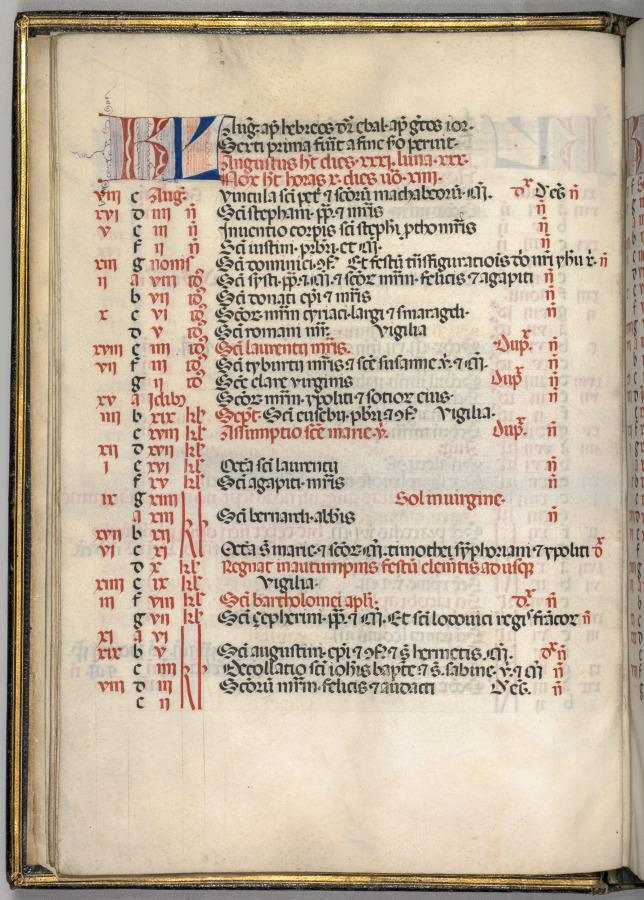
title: Missale: Fol. 6v: August Calendar Page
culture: Italy, Perugia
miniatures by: Bartolommeo Caporali (Italian, c. 1420–1503)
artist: assisted by Giapeco Caporali (Italian, d. 1478)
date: 1469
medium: ink, tempera and burnished gold on vellum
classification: Bound Volume